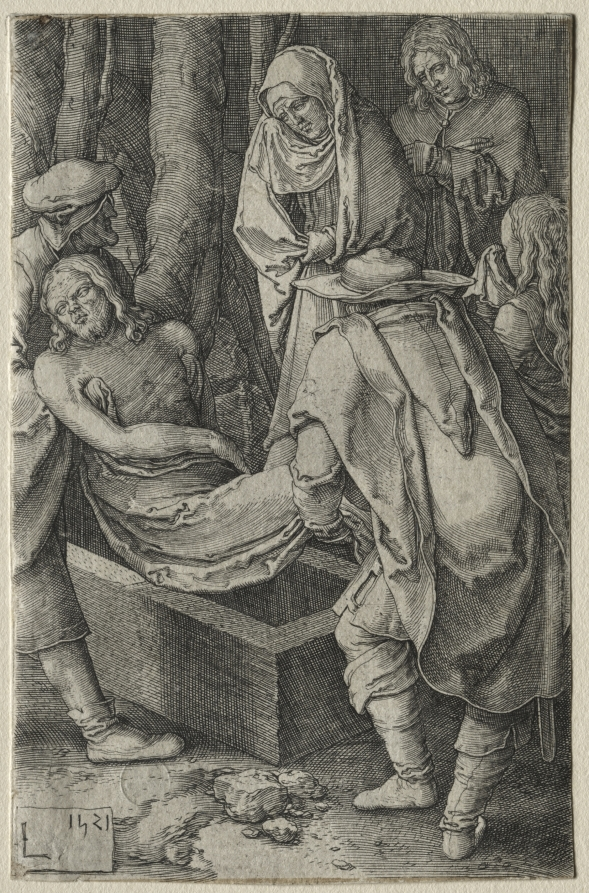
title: The Passion: The Burial of Christ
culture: Netherlands, 16th century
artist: Lucas van Leyden (Netherlandish, 1494–about 1533)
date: 1521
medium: engraving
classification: Print